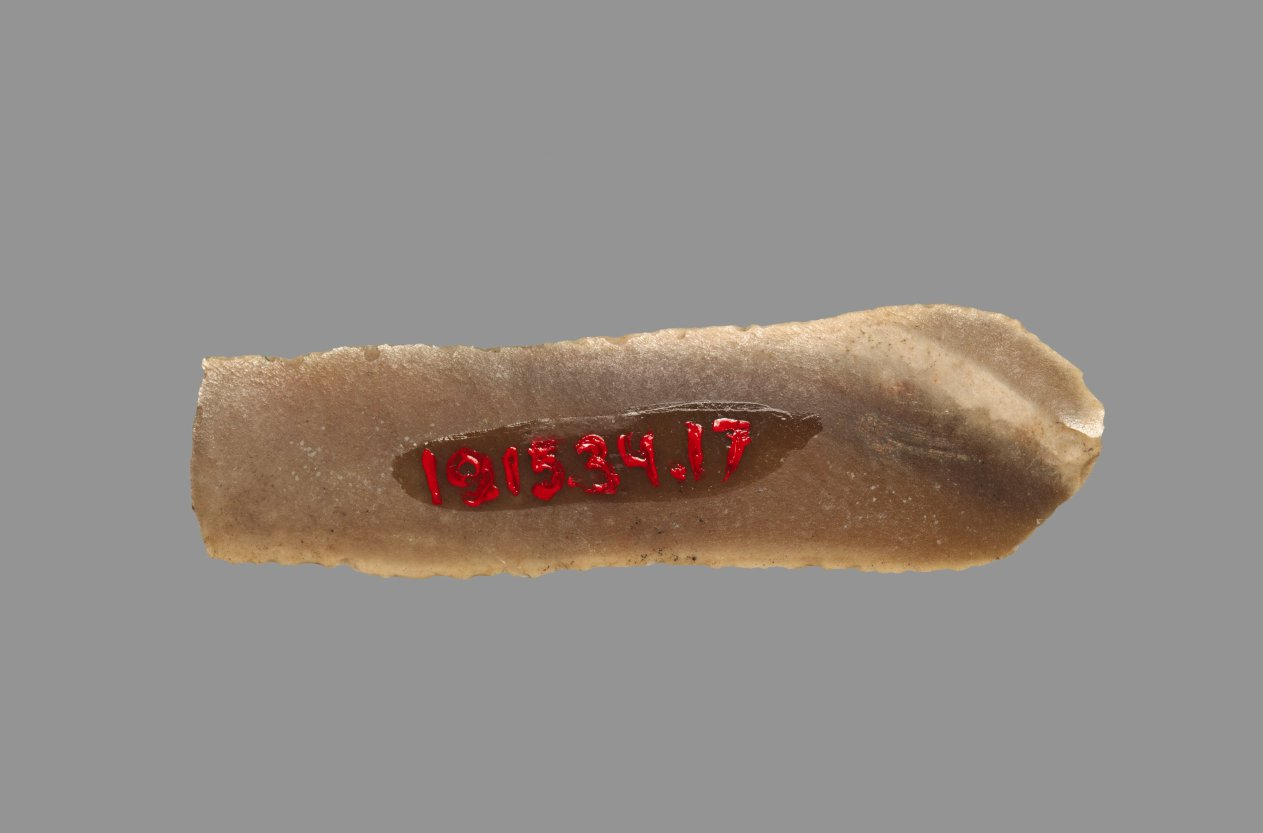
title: Sickle Blade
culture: Egypt, Middle Kingdom (2040–1648 BCE), Dynasty 12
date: 1980–1801 BCE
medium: flint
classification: Implements